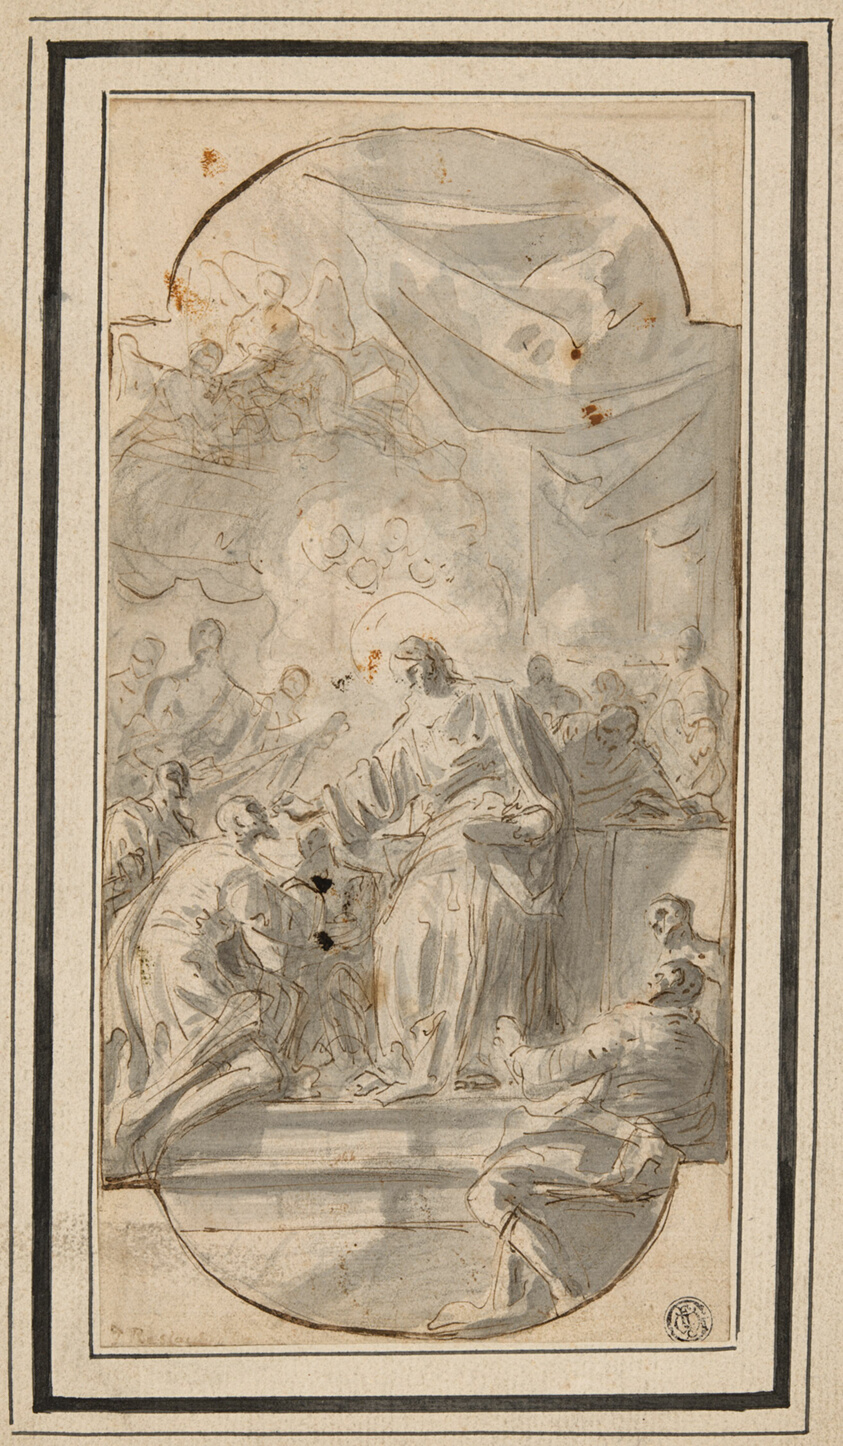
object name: Drawing and Watercolor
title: Christ Giving Communion (The Institution of the Eucharist)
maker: Attributed to Domenico Mondo (Italian, 1732-1806); or Jean Restout (French, 1692-1768)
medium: Pen and brown wash with brush and gray wash, over black chalk, on ivory laid paper, laid down on ivory laid paper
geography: Italy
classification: ink or chalk wash; drawings (visual works); prints and drawing